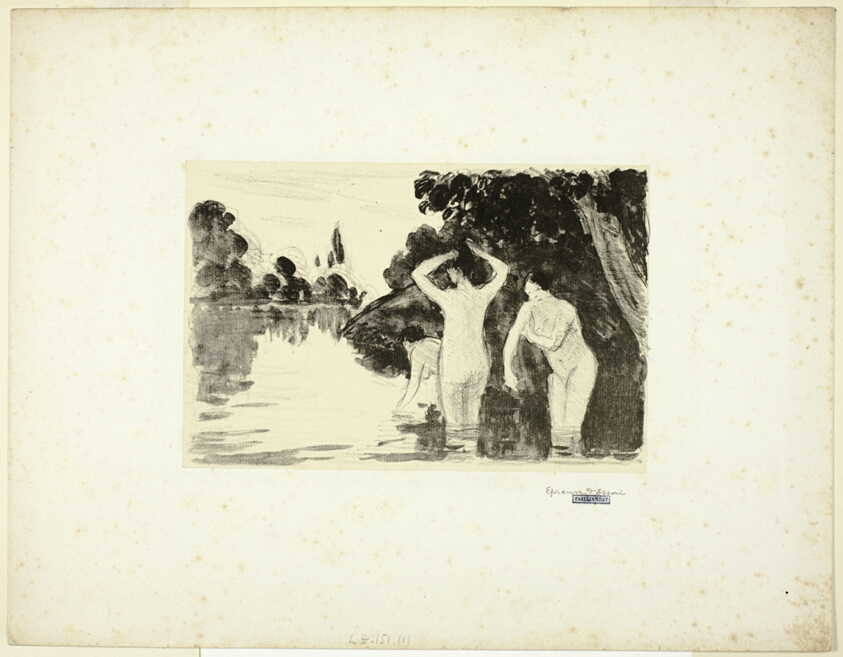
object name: Print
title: Women Bathing: Day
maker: Camille Pissarro (French, 1830-1903)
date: c. 1895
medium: Lithograph in black on cream laid paper, laid down on off-white wove paper (chine collé)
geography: France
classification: lithograph; print; prints and drawing